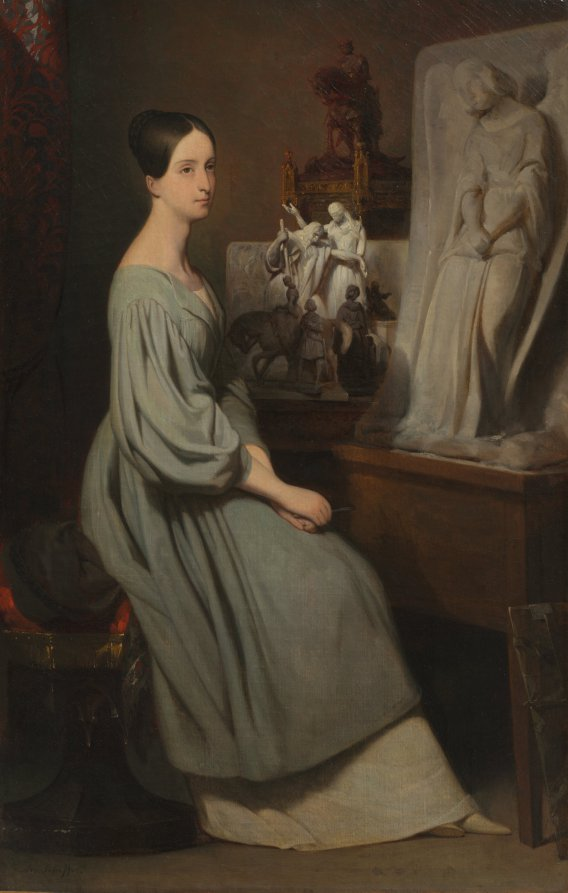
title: Princess Marie d'Orléans in Her Studio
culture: France, 19th century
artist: Ary Scheffer (Dutch, 1795–1858)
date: c. 1838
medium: oil on fabric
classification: Painting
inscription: Signed lower left: Ary Scheffer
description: Scheffer frequently portrayed his favorite pupil, the Princess Marie d'Orléans (1813-1839), daughter of King Louis Philippe and a prominent sculptor. As proof of her dedication and talent, she wears an artist's smock and holds a chisel. Seen nearby are several of her works, including her model of her most famous sculpture, a stoic depiction of Joan of Arc.